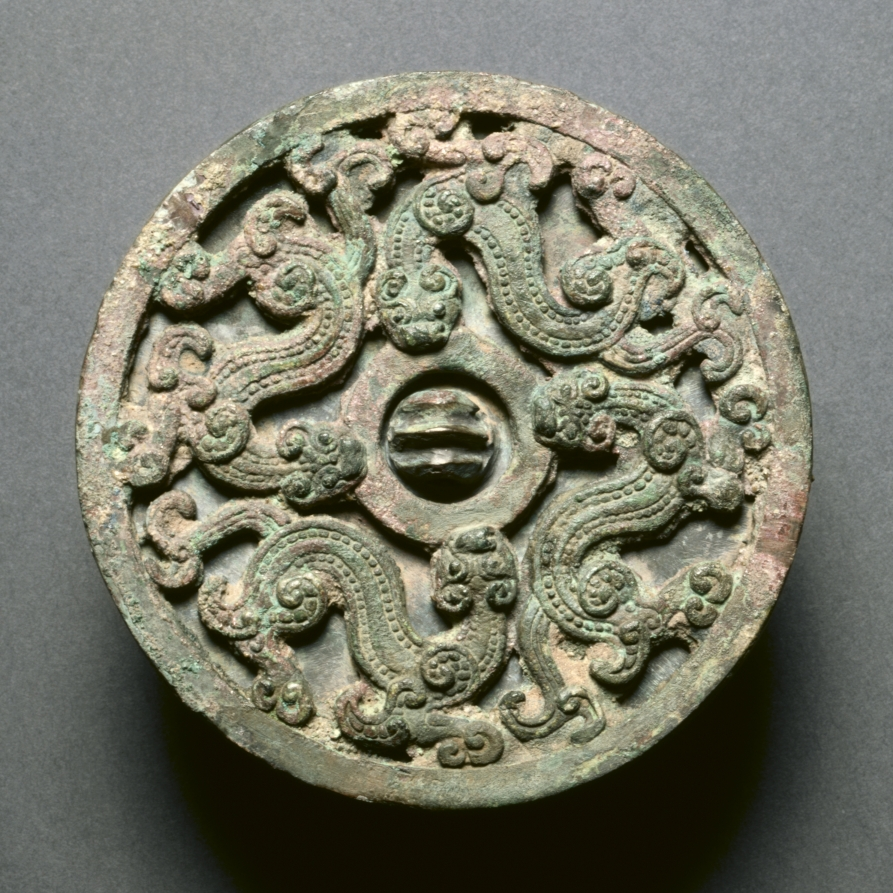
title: Double-tier Mirror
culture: China, Warring States period (475–221 BCE)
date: 300s BCE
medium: bronze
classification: Metalwork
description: The craft of mirror making prospered remarkably during the Warring States period, as bronzes increasingly served as luxury items for individuals. A variety of ornamentations appear on the backs of mirrors, some of which bear resemblance to those found in contemporary jades, lacquer wares, and textiles—all luxury items of the day. This tiny round mirror belongs to the rare double-cast type. It consists of two different layers: a reflective disc with a central knob at the back, and a ring with openwork designs of undulating serpents.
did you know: This luxury object consists of two different layers: a reflective disc with a central knob on the back, and a ring with openwork serpent designs.